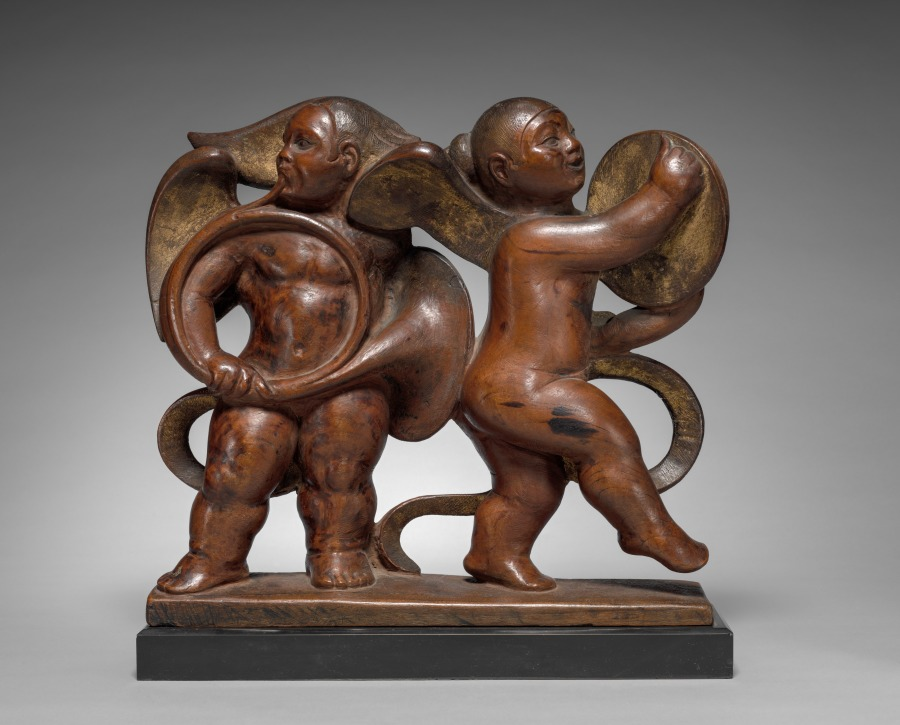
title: Dancing Children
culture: America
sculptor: Gaston Lachaise (American, born France, 1882–1935)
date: 1923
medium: wood with traces of gilt and polychrome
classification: Sculpture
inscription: Signed on right end of base: G. LACHAISE 1923